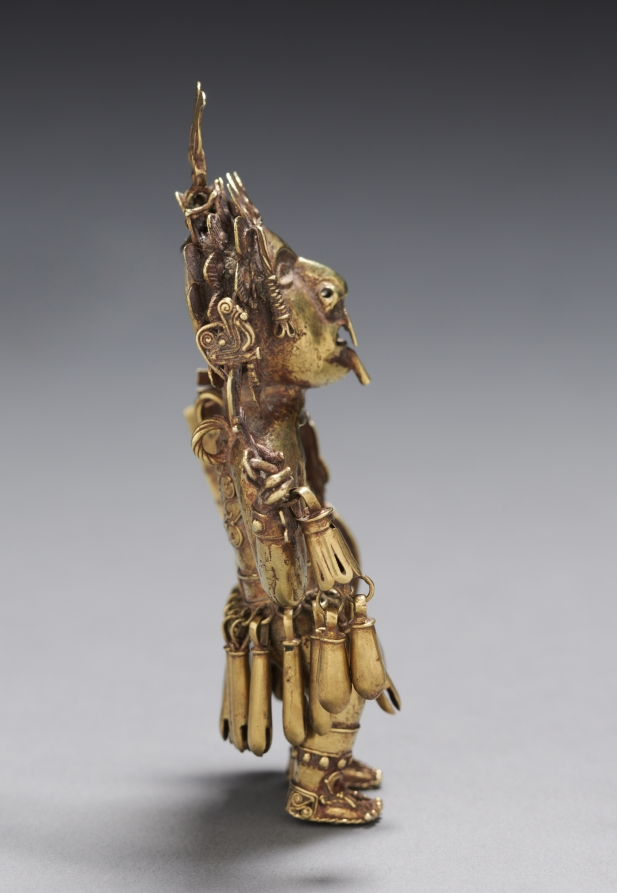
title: Figure of a Warrior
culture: Central Mexico, Tetzcoco?, Aztec, Post-Classic Period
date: after 1325 (thermoluminescence date of casting core, 1345–1575)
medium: gold-silver-copper alloy (cast)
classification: Metalwork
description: The elite status of this warrior, who holds a dartthrower, darts, and a shield, is revealed by the gold from which he is made as well as his jewelry and sandals. Military accomplishment was prized by the Aztecs, whose imperial expansion was fueled by ambition as well as their belief that they were chosen to uphold cosmic order through war. The purpose of the chest cavity is unclear; the figurine may have been worn as a pendant.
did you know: The calendar glyphs on the figure's back read "2 Rabbit, 3 Water."